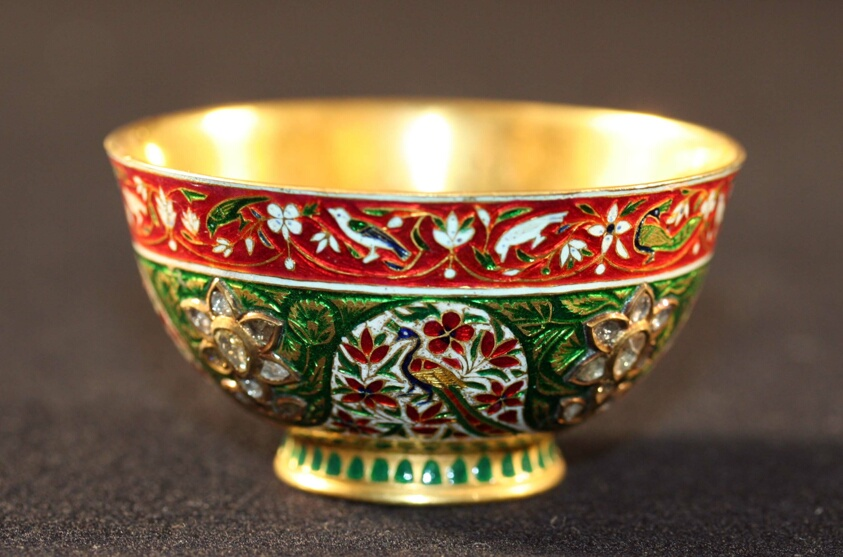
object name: Decorative Arts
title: Cup with Blossoms and Peacocks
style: South Asian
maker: India; Rajasthan, Jaipur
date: 18th century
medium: Gold and diamonds inset in the kundan technique, with polychrome enamel (minakari)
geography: India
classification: drinking vessel; gold; metalwork; asian art; decorative arts